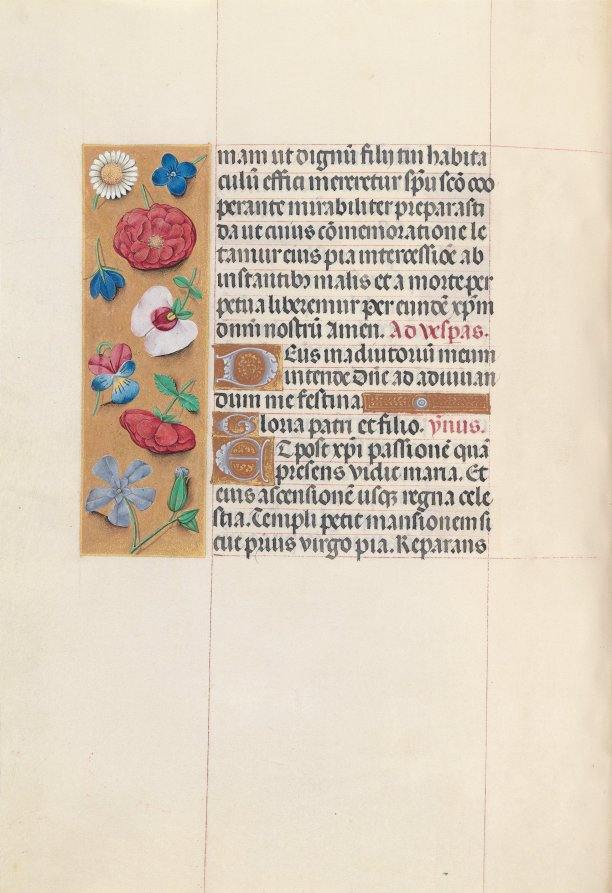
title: Hours of Queen Isabella the Catholic, Queen of Spain: Fol. 84v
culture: Flanders, Ghent and Bruges, late 15th century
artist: Master of the First Prayerbook of Maximillian (Flemish, c. 1444–1519)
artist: and Associates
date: c. 1500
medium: ink, tempera, and gold on vellum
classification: Bound Volume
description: This manuscript was illuminated by a circle of at least five highly organized manuscript painters active in the Flemish cities of Ghent and Bruges. The principal illuminator was Alexander Bening, who painted the majority of the book's miniatures. Manuscripts produced by this circle of artists are renowned for the decoration of their borders, which typically feature a rich variety of realistically-painted flowers, birds, and butterflies. This prayer book, called a book of hours, was intended not for a cleric, but for the private devotions of a lay person-in this case, Isabella the Catholic, Queen of Spain (1451-1504). Isabella's coat of arms embellishes the book's frontispiece. It is unlikely that the book was commissioned by the Queen herself; rather, she probably received it as a diplomatic gift from someone courting her patronage, perhaps Cardinal Francisco Jimenez de Cisneros. A Franciscan friar, Jimenez was dependent upon Isabella for his advancement, first to the post of Queen's confessor in 1492, and then to Archbishop of Toledo in 1495.